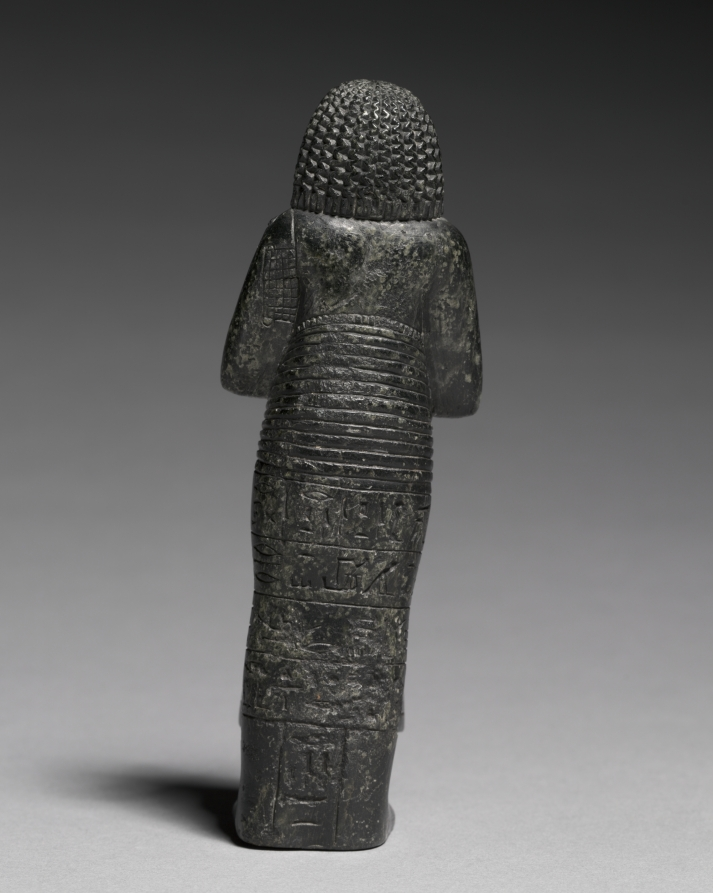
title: Shawabty of Nebmehyt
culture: Egypt, New Kingdom (1540–1069 BCE), Dynasty 19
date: c. 1295–1240 BCE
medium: steatite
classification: Funerary Equipment